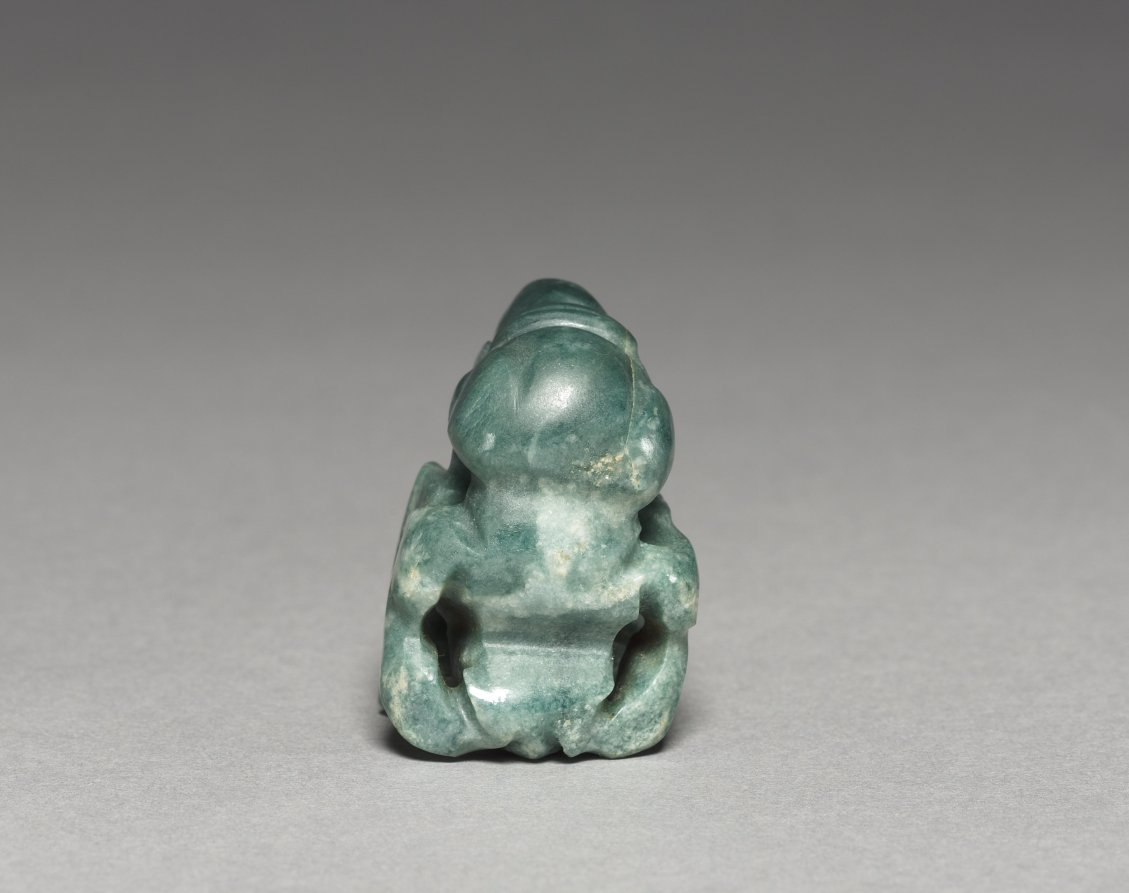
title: Bird Pendant (Buzzard or Vulture?)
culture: Costa Rica, Atlantic Watershed region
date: c. 300 BCE–600 CE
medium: jadeite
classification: Jewelry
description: Before about AD 500, when gold-working technologies were adopted in Costa Rica, jade was the quintessential luxury material and it was masterfully carved into exquisite ornaments of many kinds. Ancient Americans did not use many metal tools, and artists carved jade, a tough stone, with implements of stone, bone, bamboo, or reed.